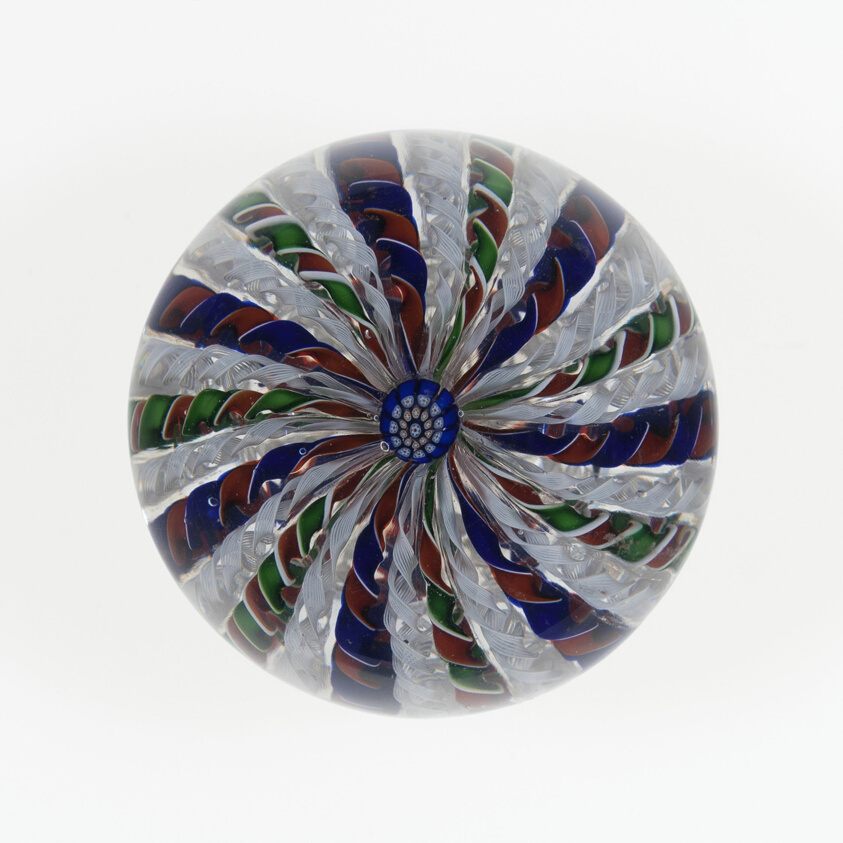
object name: Glass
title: Paperweight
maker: Saint-Louis Glassworks (Cristalleries de Saint-Louis); Lorraine, France, founded 1586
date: c. 1848–55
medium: Glass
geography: Saint-Louis-lès-Bitche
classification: paperweight; glass